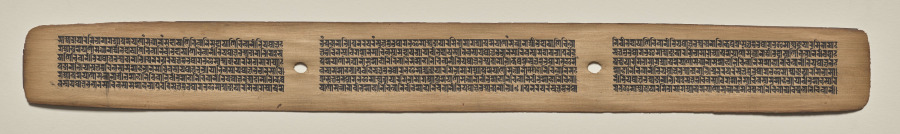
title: Text, Folio 92 (recto), from a Manuscript of the Perfection of Wisdom in Eight Thousand Lines (Ashtasahasrika Prajnaparamita-sutra)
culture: Eastern India, Bihar, Vikramashila Monastery. Painting: Nepal, Kathmandu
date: Sunday, September 14, 1119 (year 239 of the Newar Samvat in the month of Ashvina)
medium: gum tempera and ink on palm leaves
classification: Painting